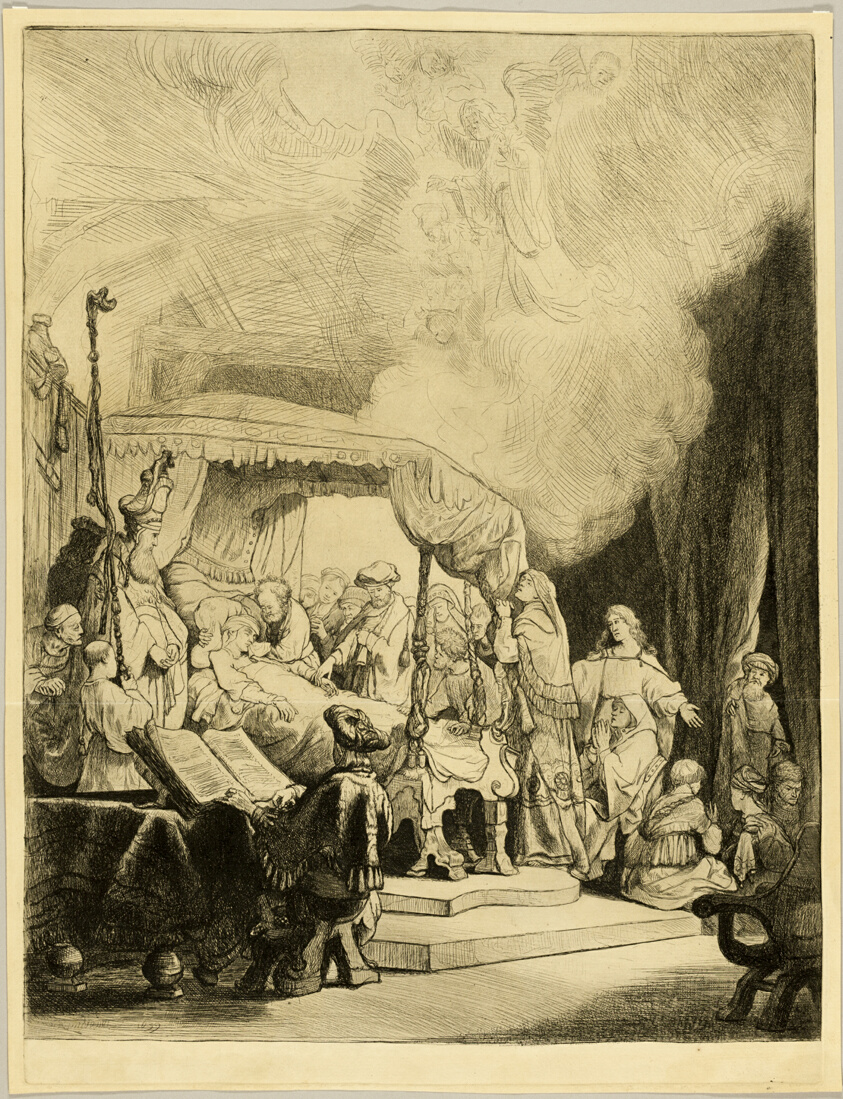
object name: Print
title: The Death of the Virgin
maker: Thomas Worlidge (English, 1700-1766); after Rembrandt van Rijn (Dutch, 1606-1669)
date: 18th c.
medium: Etching in black on cream laid paper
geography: England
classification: etching; paper; print; prints and drawing